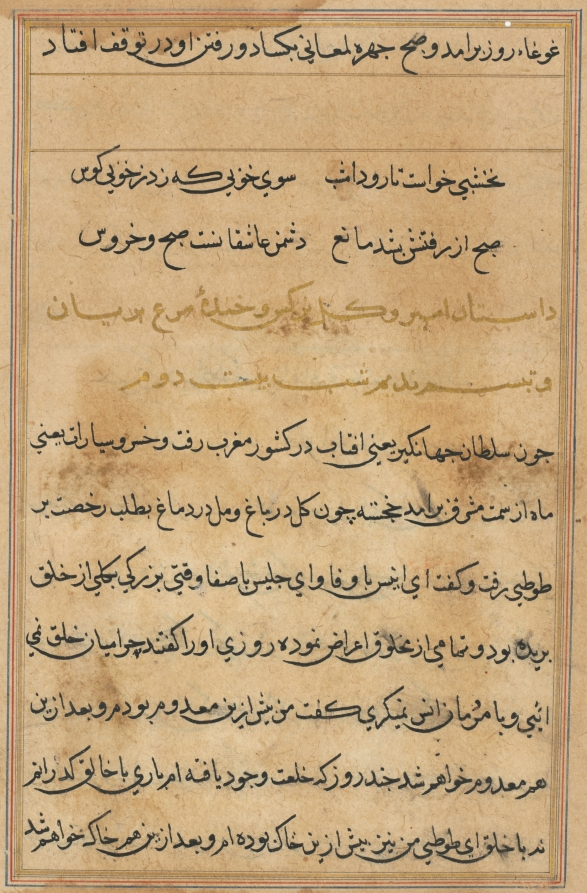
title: Page from Tales of a Parrot (Tuti-nama): text page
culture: Mughal India, court of Akbar (reigned 1556–1605)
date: c. 1560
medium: gum tempera, ink, and gold on paper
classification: Painting